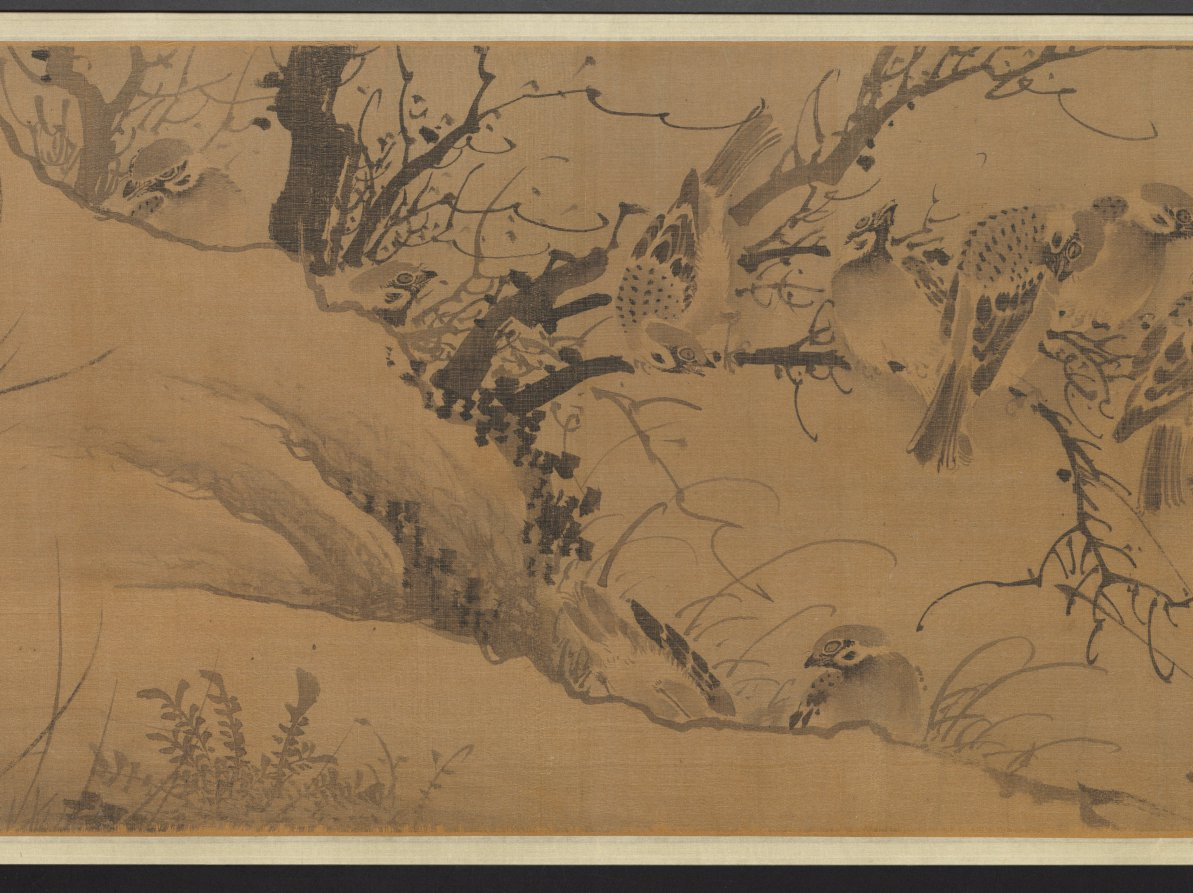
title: A Hundred Sparrows in a Lofty Grove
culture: China, Ming dynasty (1368–1644)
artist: attributed to Lin Liang (Chinese, 1416–1480)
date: 1368–1644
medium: handscroll; ink on silk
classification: Painting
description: Sparrows engaged in all kinds of activities frolic amid leafy branches, blades of grass, rocks, and a waterfall. As our eyes move over the scroll, the artist engages us in enjoying the sparrows’ carefree movements in a natural setting. The charming birds were painted from close observation in swift and fluent brushstrokes. Sparrows are a common bird and in Chinese painting they often represent the commoner in human society as opposed to the noble pheasant or peacock representative of the ruling class.